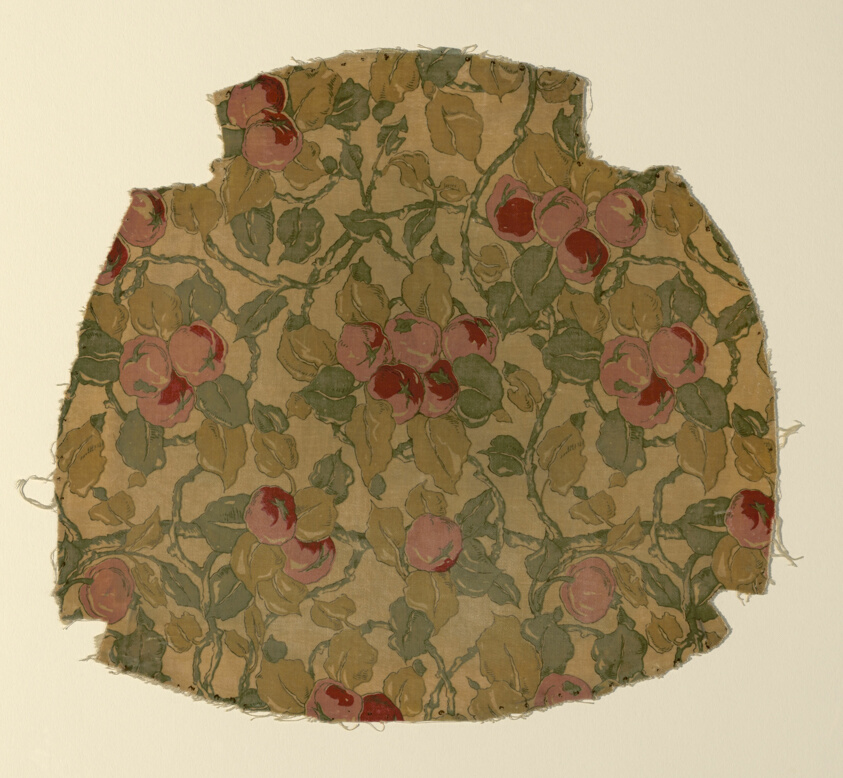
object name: Textile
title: Fragment of Velvet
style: Arts and Crafts Movement, british, British Arts and Crafts Movement, 18th Century, 19th century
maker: England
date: Made c. 1900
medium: Cotton, warp-floar faced twill weave; with supplementary patterning wefts forming cut pile (velveteen); roller printed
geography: England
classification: textile; weaving - printed; furnishing textile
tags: botanical, floral, foliage